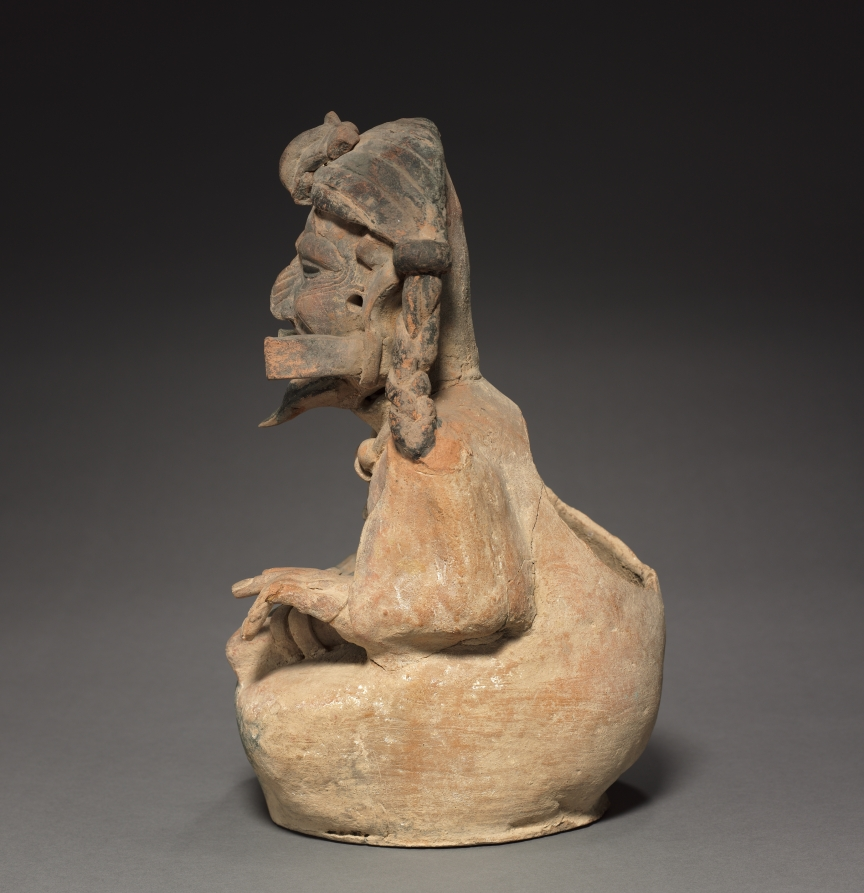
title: Elderly Figure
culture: Mexico, Campeche, Veracruz Monumental Sculpture Type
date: 600–900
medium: molded and modeled pottery with gray, tan and black paint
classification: Sculpture